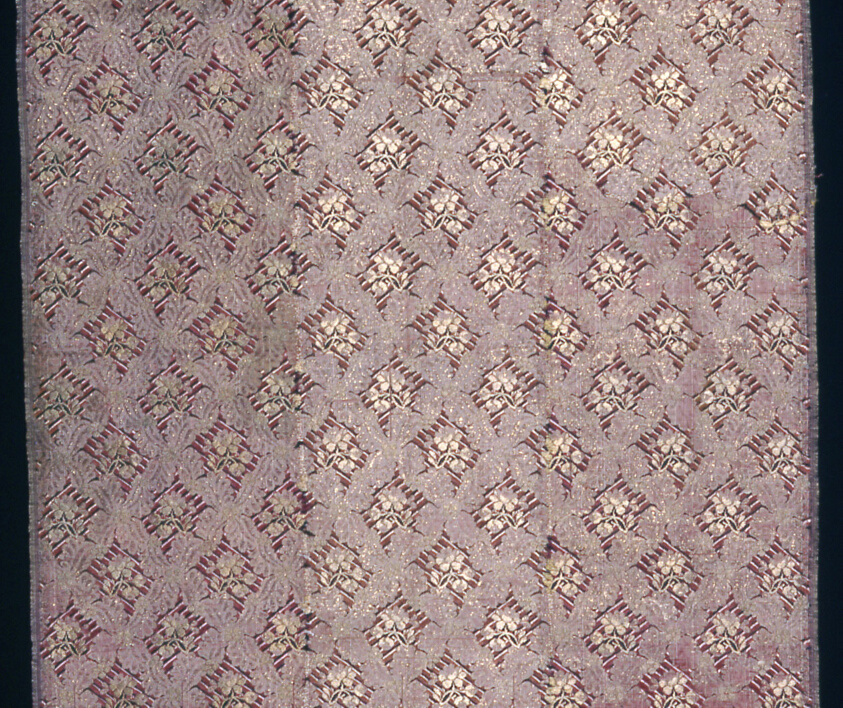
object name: Textile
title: Panel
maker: France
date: c. 1780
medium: Silk, gilt-metal strips, and gilt-metal-strip-wrapped silk, two-color complementary weft plain weave with supplementary patterning warps, supplementary facing and brocading wefts and self-patterned by ground weft floats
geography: France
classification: textile; weaving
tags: lattices, flowers